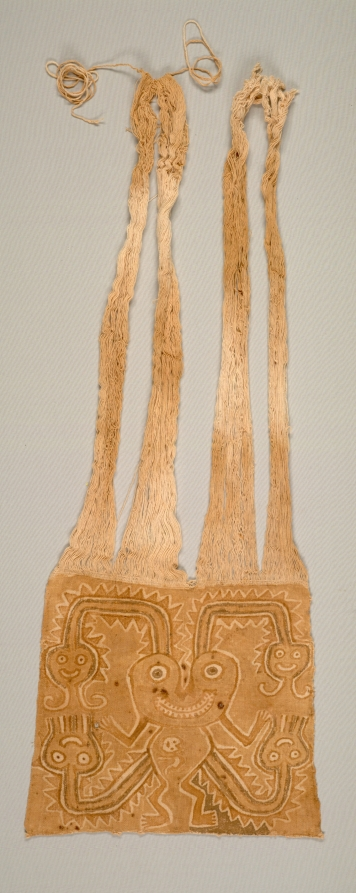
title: Mummy Bundle "Mask"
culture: Peru, South Coast, Ica Valley, Ocucaje site, Paracas style (700 BCE–1 CE)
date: 400–200 BCE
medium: cotton and pigment, plain weave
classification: Textile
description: The Paracas people buried their dead in bundles that they created by carefully wrapping the seated human body in layers of garments and other textiles. In some cases, they placed a painted cloth—such as these examples—on the outer layer and at the top of the bundle. The hair-like yarns (unwoven warps) were arranged around a solid cotton disk that was sometimes wrapped with a headband. The cloths, then, seem to have functioned as the bundle’s head, even though some are painted not with faces but with complete figures whose supernatural character is marked by the appendages streaming from their bodies.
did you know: These masks fall into two categories, those with only a face and those with a full-bodied figure.